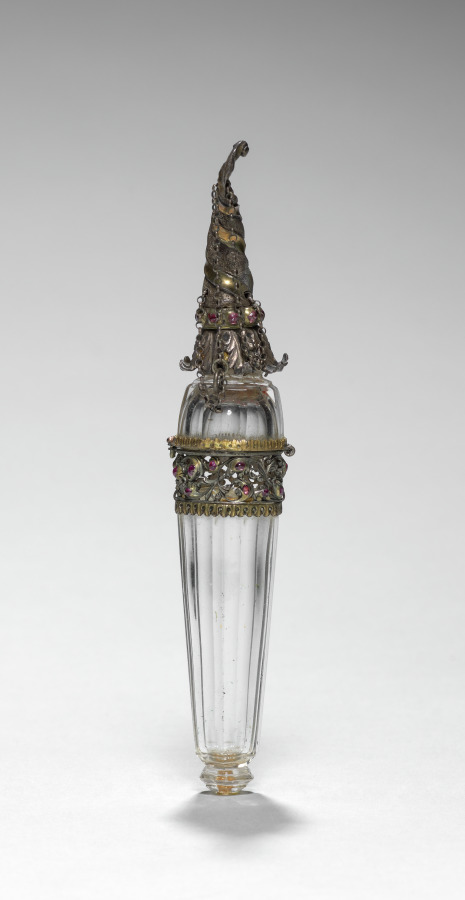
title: Scent Bottle (Vinaigrette)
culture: France, 19th century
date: 1800s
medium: glass mounted in silver (?) partially gilt and set with pink cabochon stones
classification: Miscellaneous